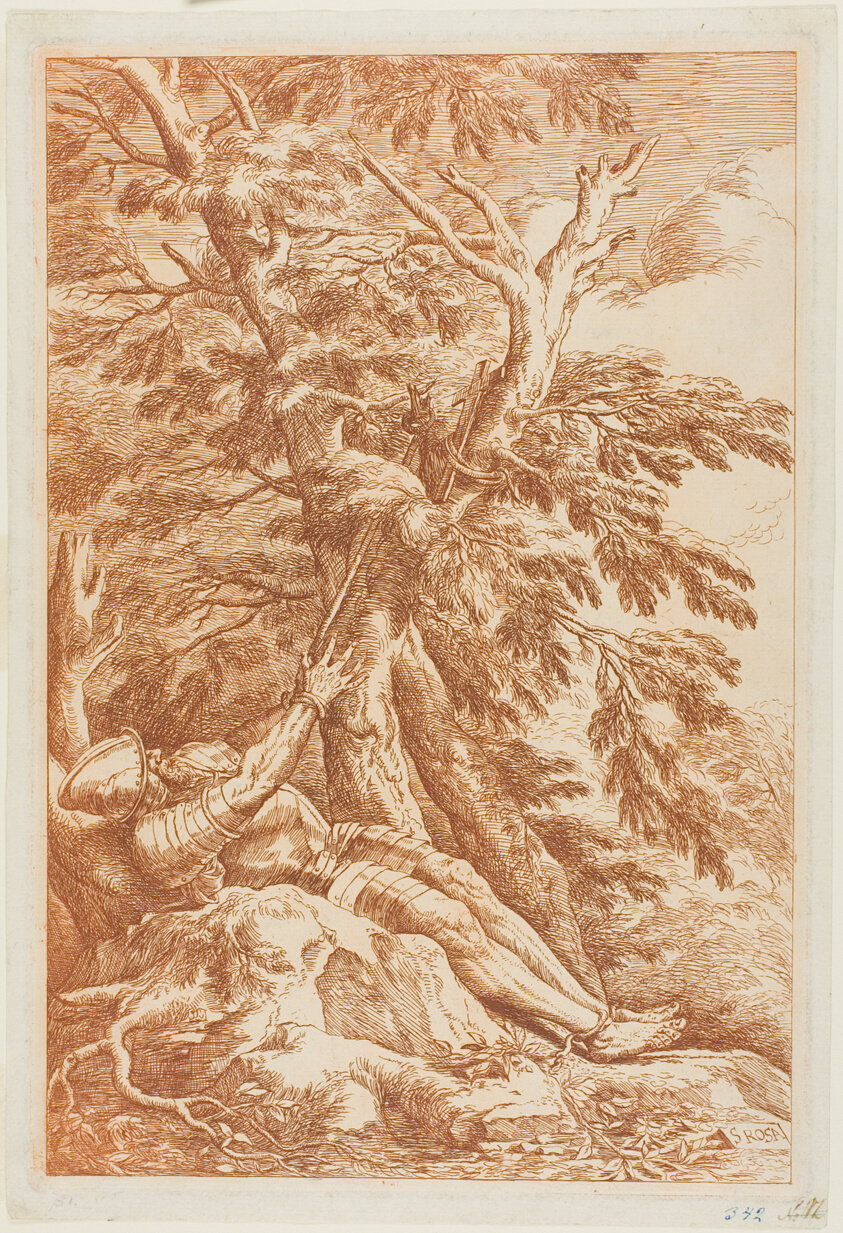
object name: Print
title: Saint William of Maleval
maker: After Salvator Rosa; Italian, 1615-1673; Carlo Antonini ?; c.1740 - c.1784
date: c. 1780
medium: Etching in sanguine on ivory laid paper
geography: Italy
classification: etching; print; prints and drawing